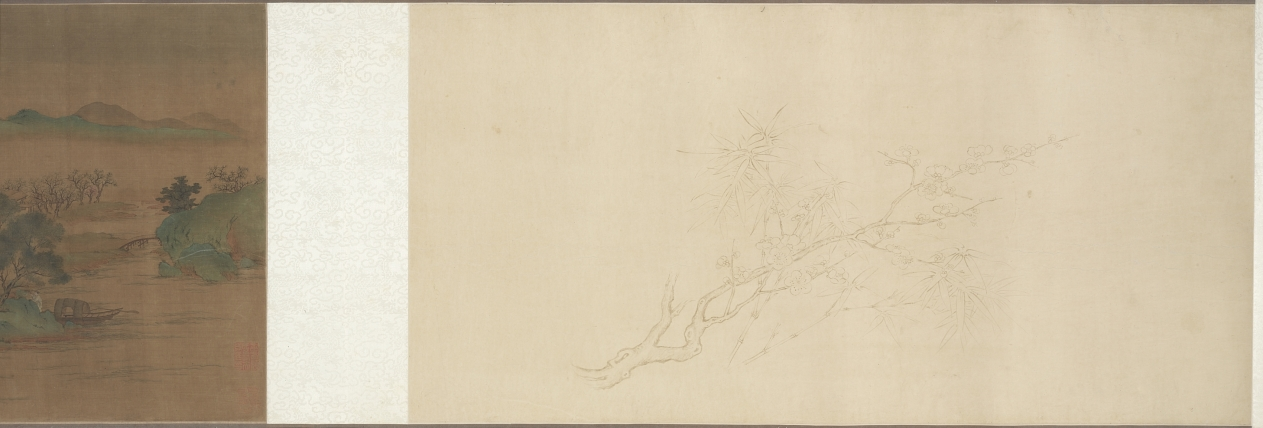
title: Landscape, The Palace of the Clouds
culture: China, Qing dynasty (1644-1911)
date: 1644–1911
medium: handscroll, ink on silk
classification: Painting